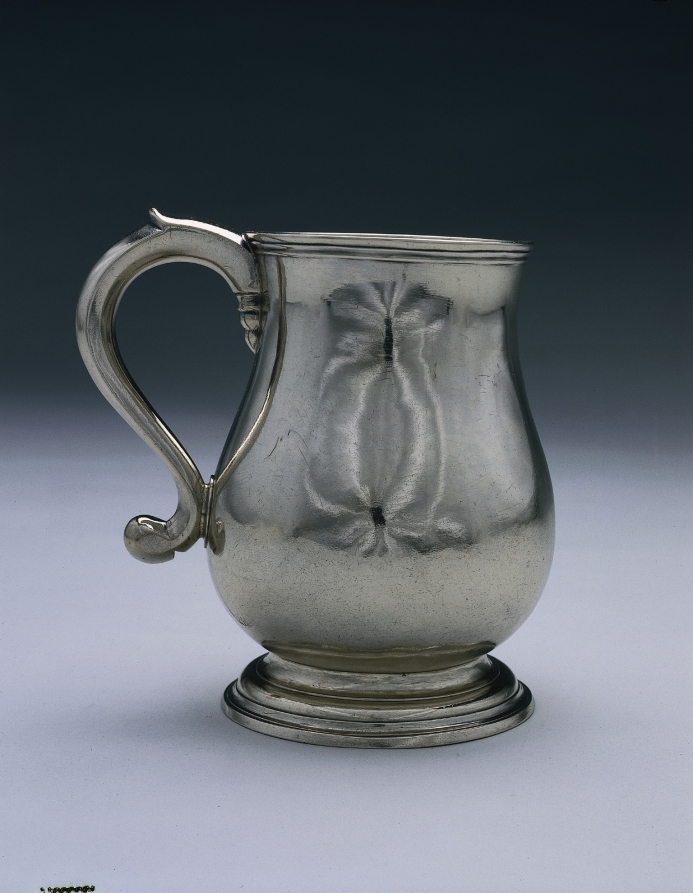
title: Cann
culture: America, Massachusetts, Boston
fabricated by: Rufus Greene (American, 1707–1777)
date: c. 1730–35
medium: silver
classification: Silver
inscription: engraved "E*L" in block letters on bottom, and "H" in bright-cut script on side opposite handle.